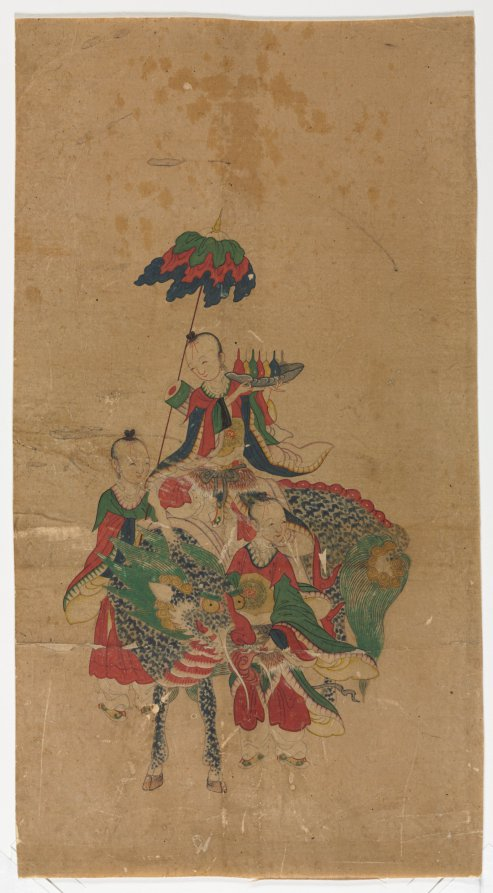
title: Daoist Immortal on a Qilin and Two Attendants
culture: Korea, Joseon dynasty (1392–1910)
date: late 1800s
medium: Ink and color on paper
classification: Painting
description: By the late 18th century, subjects that deal with Daoist immortals and their fantasy stories were increasingly chosen for paintings. For their wish-granting message, Daoist figure paintings such as this one were often commissioned to celebrate festive occasions. Judging from its dimension, this paining used to be part of either a small-size multi-panel folding screen or a large-size album that depicts a series of Daoist immortals and Buddhist deities.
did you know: As a fantastical animal hybrid of a griffin and a sphinx, the animal qilin was used as a symbol of heavenly blessings.